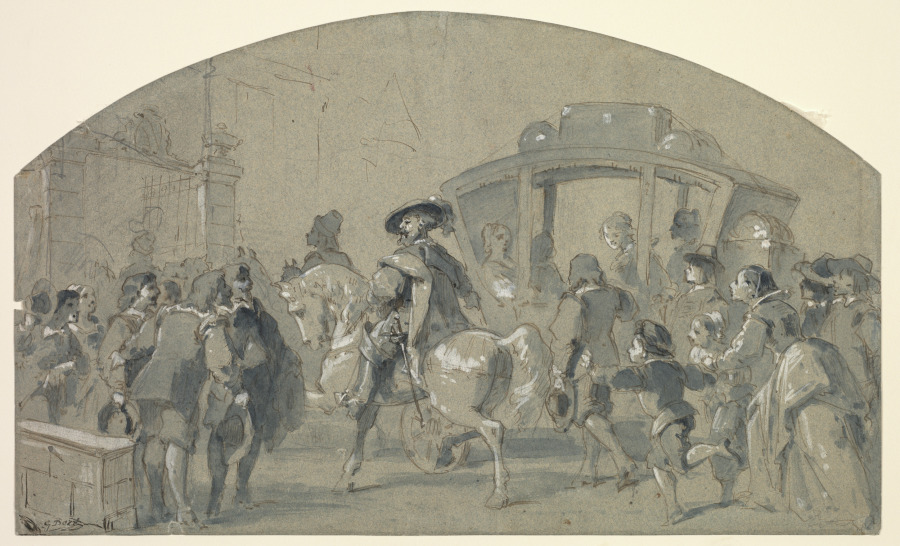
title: Street Scene (recto)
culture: France, 19th century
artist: Gustave Doré (French, 1832–1883)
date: c. 1848–49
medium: pen and brown ink and gray wash with white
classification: Drawing